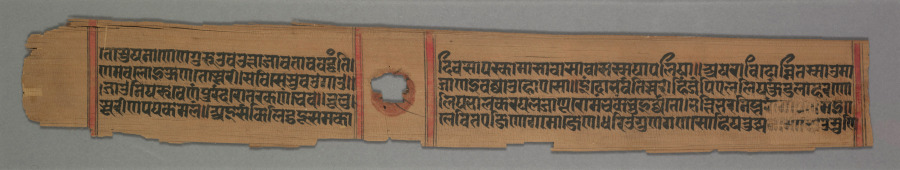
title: Folio (recto) from a Kalpa-sutra and Story of Kalakacharya of Devachandra: Text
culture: Western India, Gujarat, 13th century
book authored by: Devachandra (Indian)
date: 1279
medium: Gum tempera and ink on palm leaf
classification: Painting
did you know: This version of the story of Kalaka was composed in 1089.